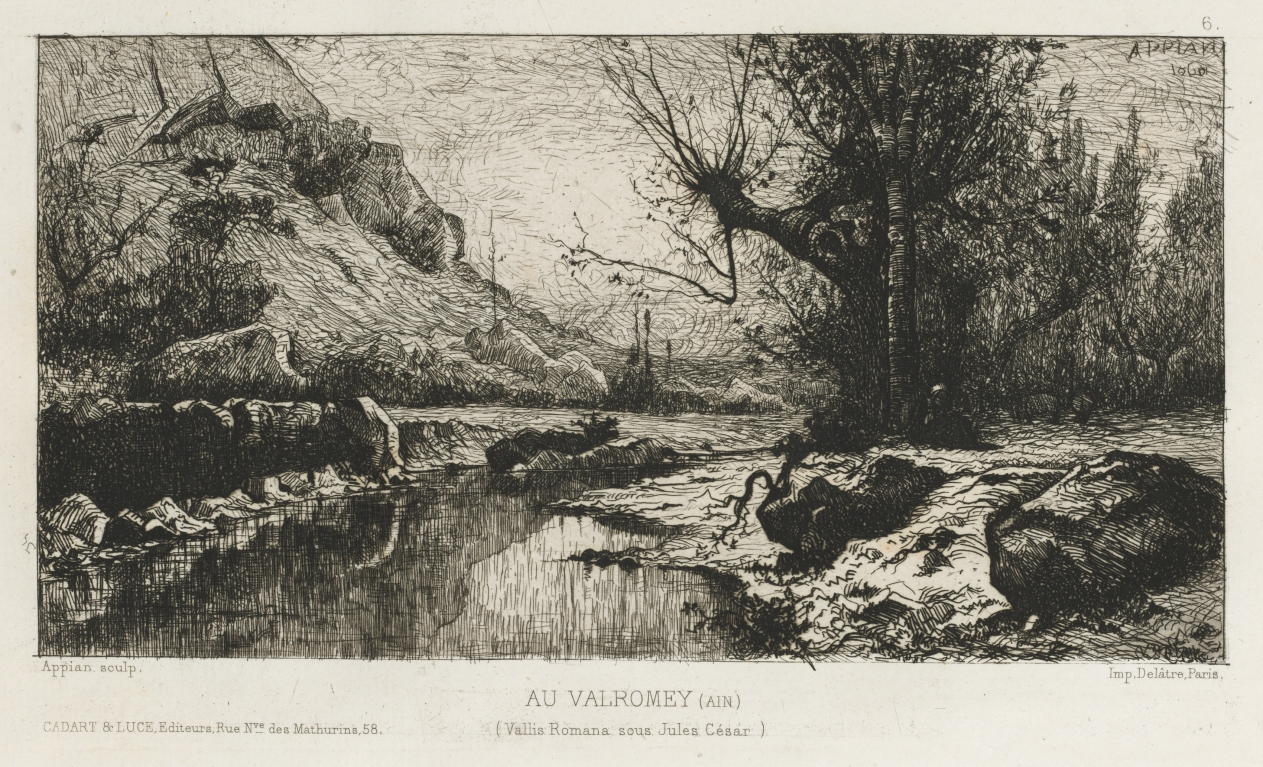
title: At Valromay (Ain)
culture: France, 19th century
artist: Adolphe Appian (French, 1818–1898)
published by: Cadart et Luce, Editeurs, rue Nve. des Mathurins, 58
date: 1868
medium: etching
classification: Print